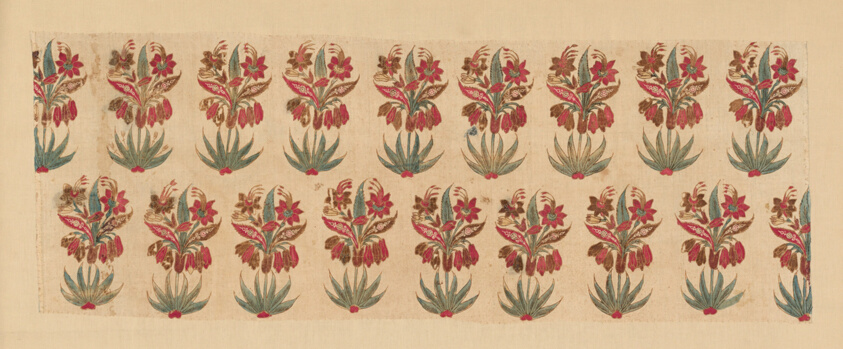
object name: Textile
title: Curtain Fragment with Rows of Flowers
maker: India; Coromandel Coast, probably Petaboli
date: Before 1667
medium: Cotton, plain weave; mordant painted and resist-dyed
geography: India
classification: weaving; textile